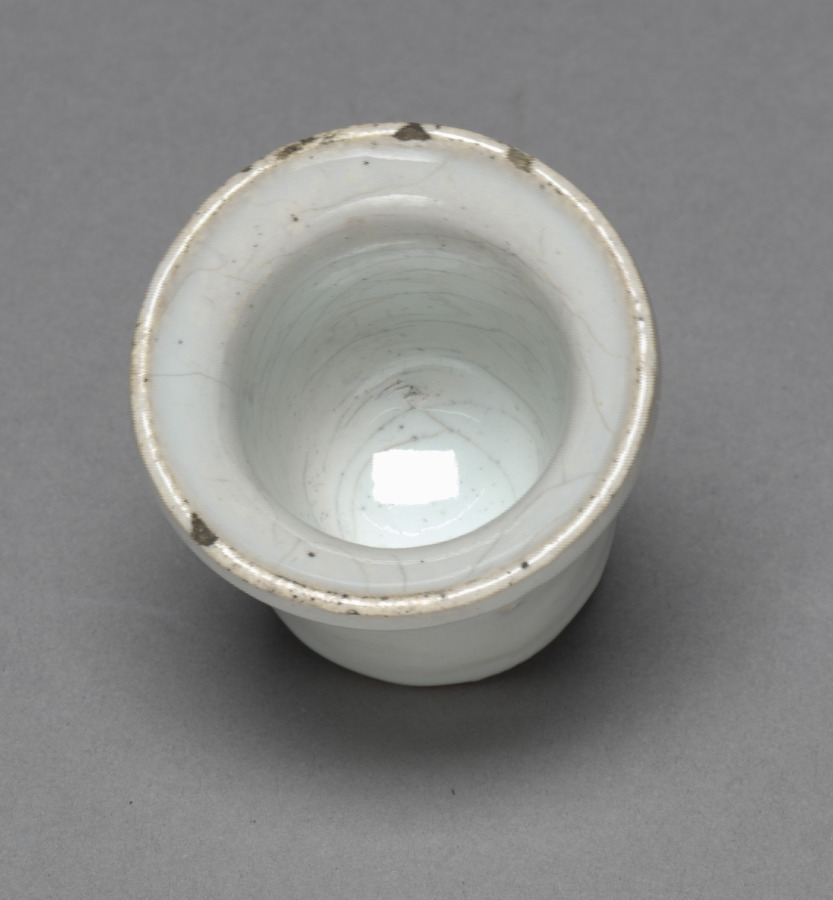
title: Inkwell from Writing Stand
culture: France, Sinceny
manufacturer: Sinceny Factory (French)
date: 1746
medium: Tin-glazed earthenware (faience) with enamel decoration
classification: Ceramic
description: The faience factory at Sinceny was an offshoot of that at Rouen. In style, Sinceny closely resembles later Rouen wares with polychrome decoration. The stylized flowers and insects which decorate this writing stand are entirely typical of Sinceny faience.